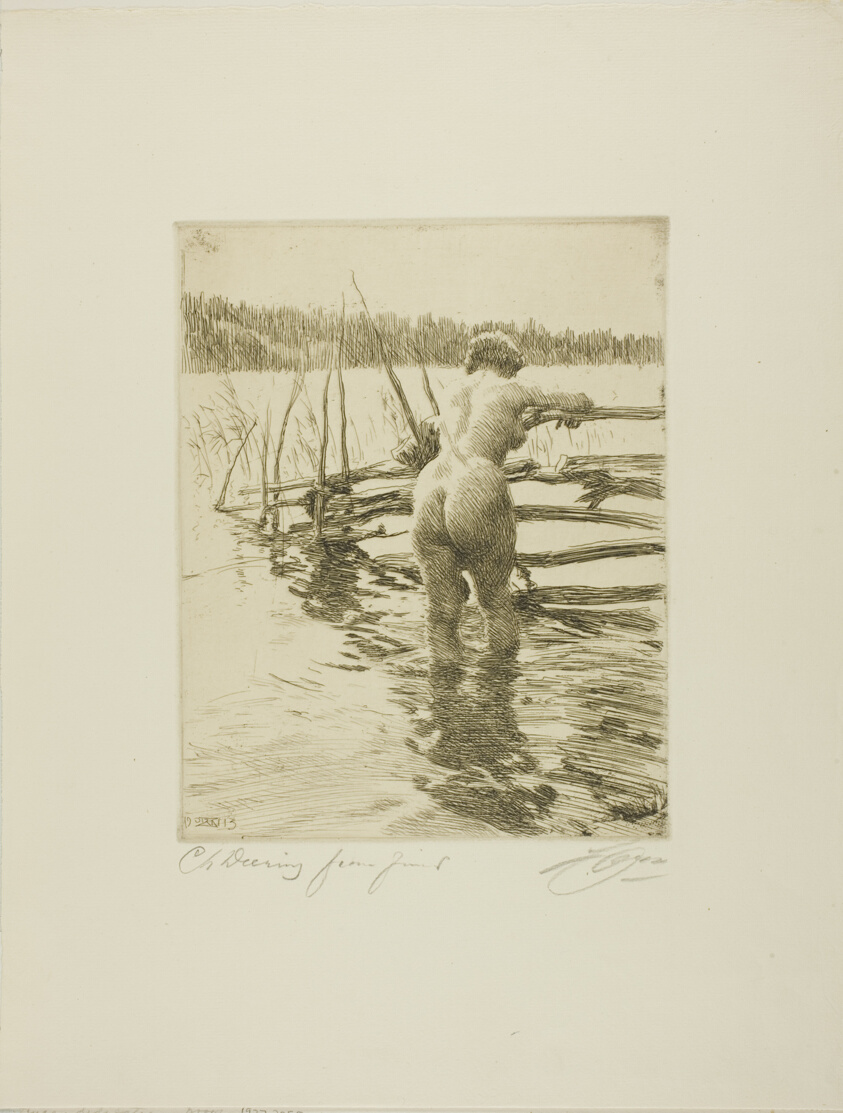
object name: Print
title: The Fence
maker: Anders Zorn (Swedish, 1860-1920)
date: 1913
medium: Etching on ivory laid paper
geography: Sweden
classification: etching; print; prints and drawing